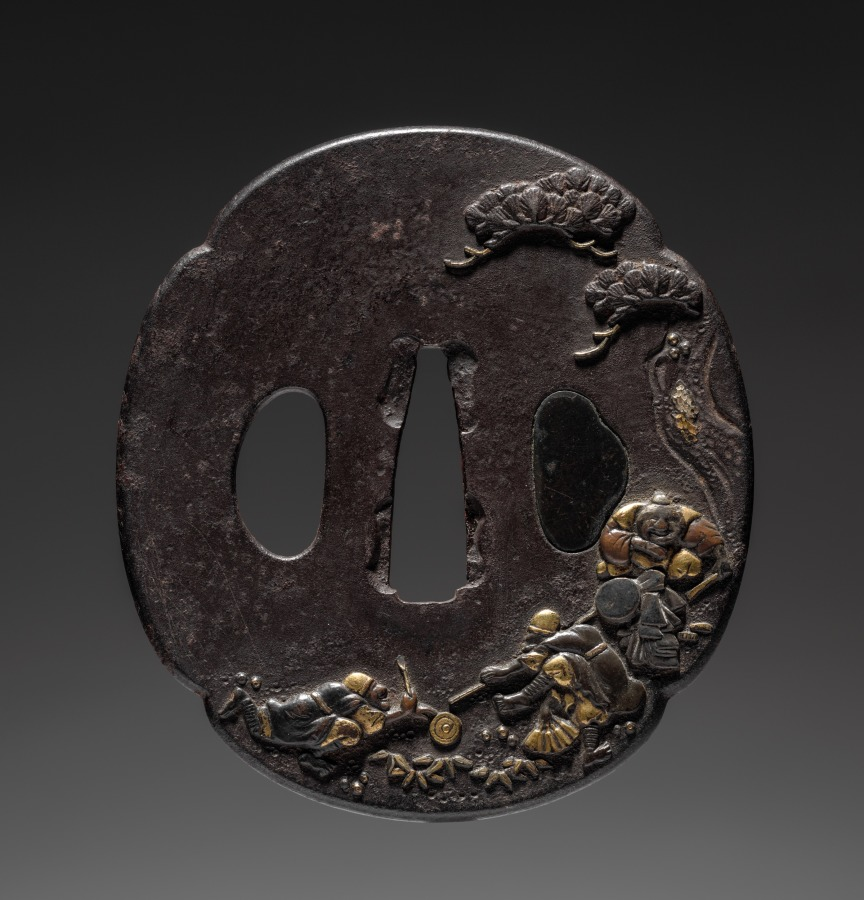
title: Sword Guard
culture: Japan, Edo period (1615–1868)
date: 1615–1868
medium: iron, gold, and mother-of-pearl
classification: Arms and Armor